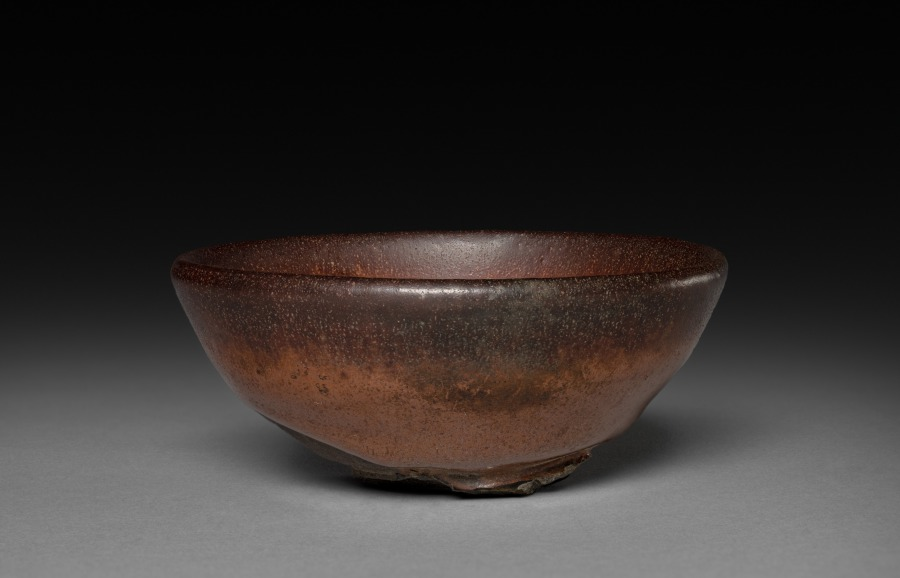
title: Tea Bowl: Jian ware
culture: China, Fujian province, Song dynasty (960-1279)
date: 960– 1279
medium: stoneware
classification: Ceramic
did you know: Jian ware was very popular with the tea cultures in China and Japan.